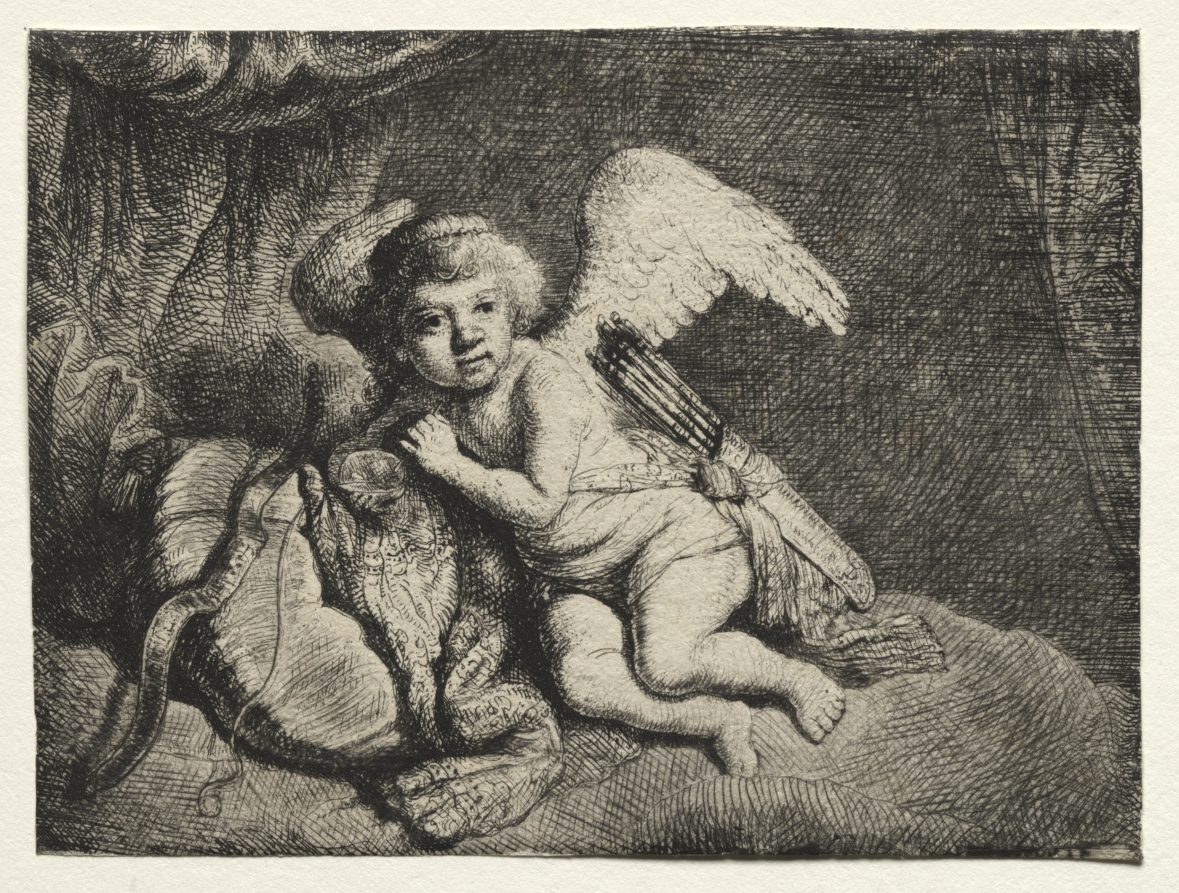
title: Cupid Resting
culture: Netherlands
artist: after Rembrandt van Rijn (Dutch, 1606–1669)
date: 1600s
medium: etching and drypoint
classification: Print